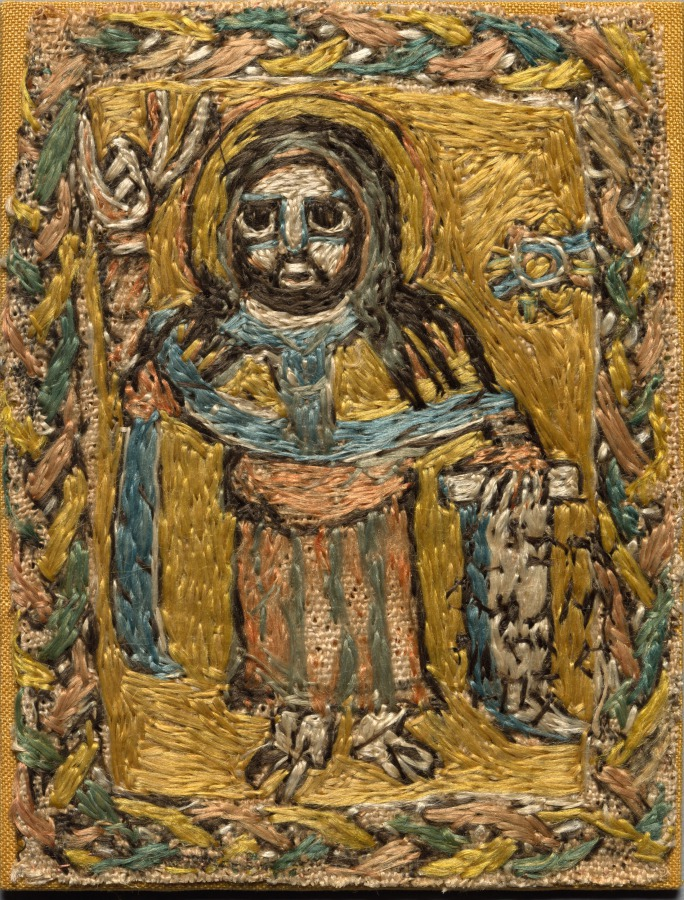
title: Fragment of a Clavus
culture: Egypt, Abbasid period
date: late 700s - early 800s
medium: embroidery on tabby weave: silk and linen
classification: Embroidery